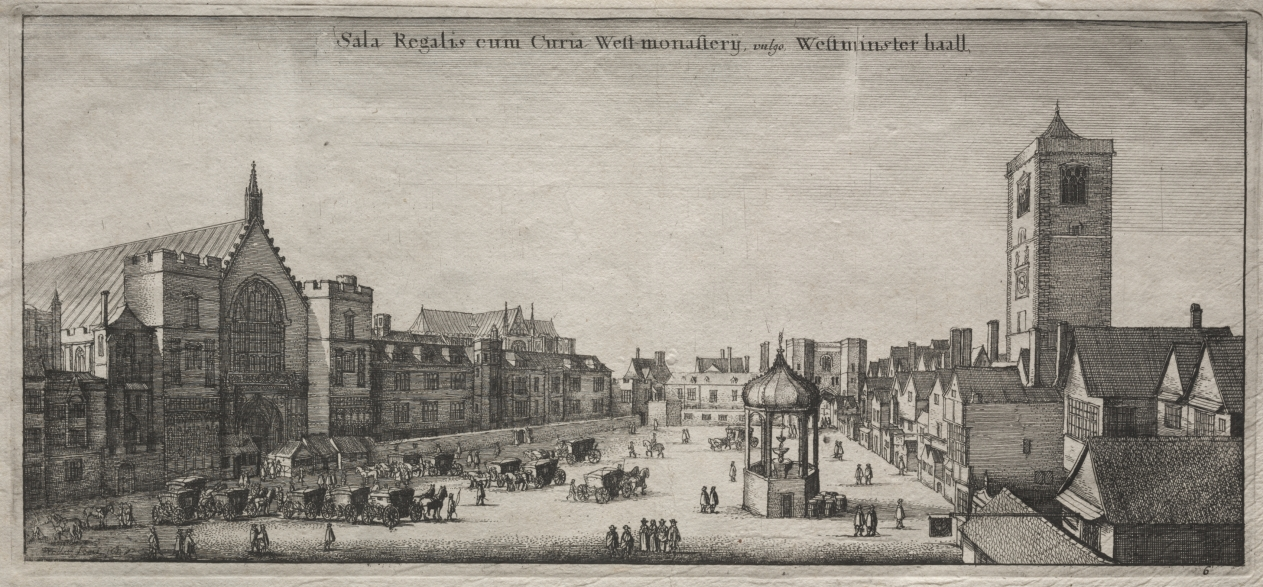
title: Views of London: New Palace Yard with Westminster Hall, and the Clock House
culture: Bohemia, 17th century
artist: Wenceslaus Hollar (Bohemian, 1607–1677)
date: 1647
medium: etching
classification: Print